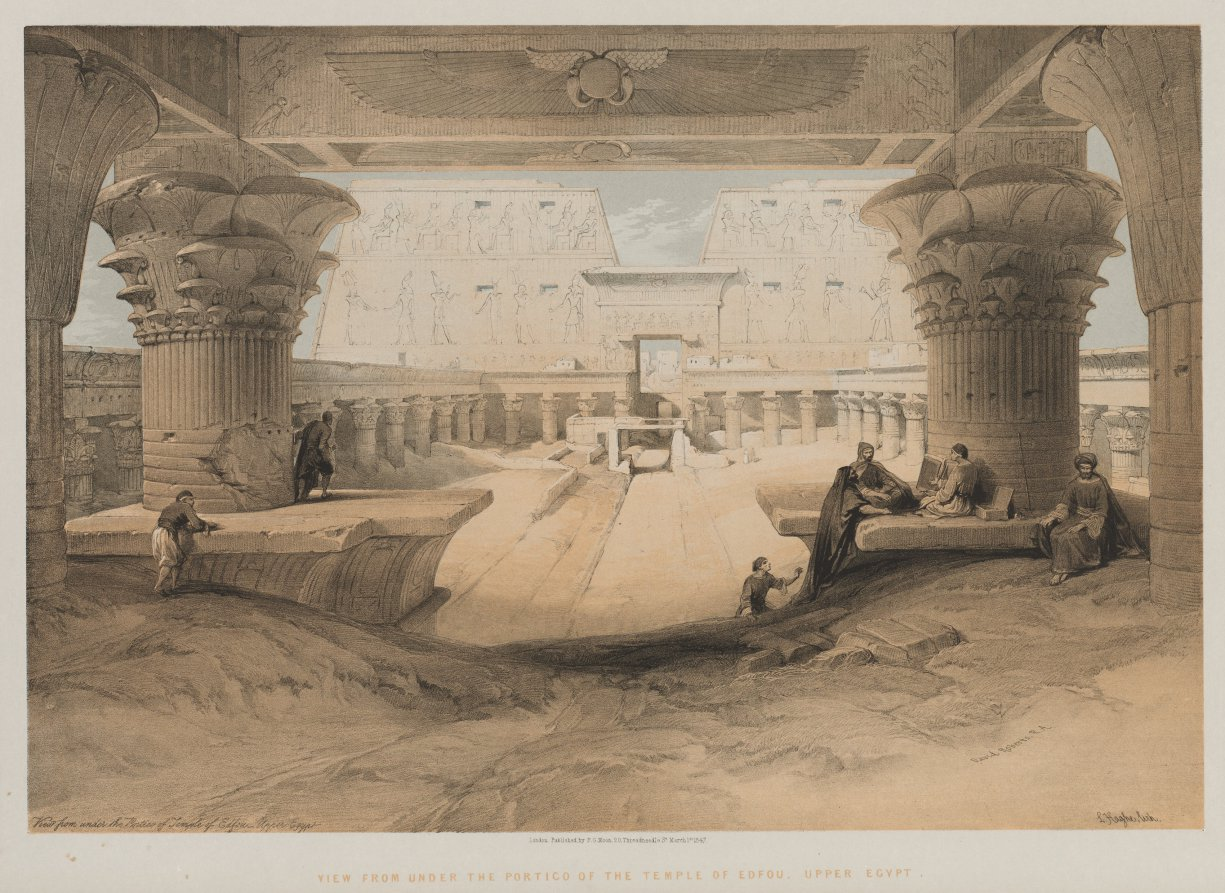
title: Egypt and Nubia, Volume I: View from Under the Portico of the Temple of Edfou, Upper Egypt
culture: England, 19th century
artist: Louis Haghe (British, 1806–1885)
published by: F. G. Moon, 20 Threadneedle Street, London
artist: after David Roberts (Scottish, 1796–1864)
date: 1847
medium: color lithograph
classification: Print